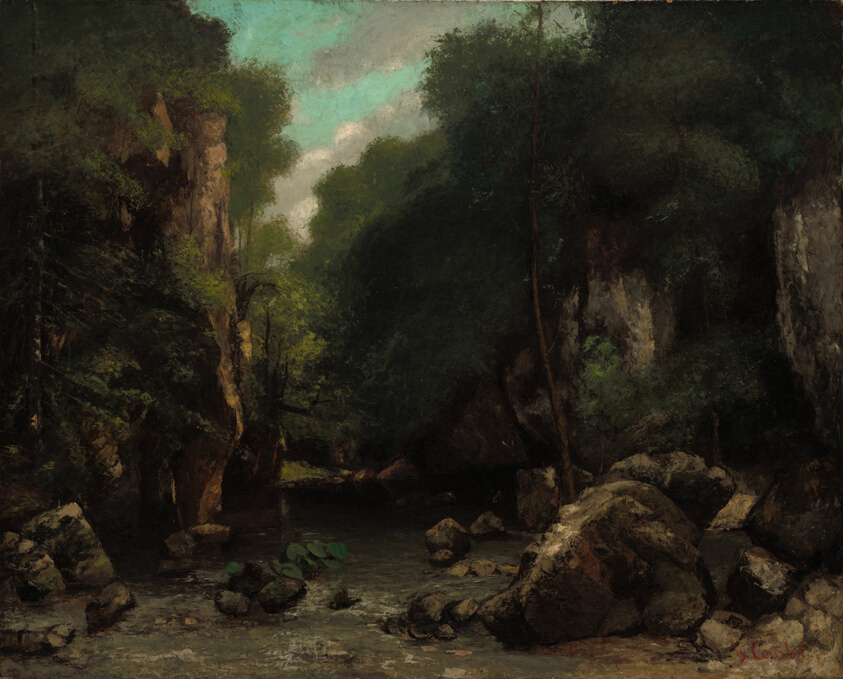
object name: Painting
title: The Valley of Les Puits-Noir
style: Realism, 19th century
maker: Gustave Courbet (French, 1819–1877)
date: 1868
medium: Oil on canvas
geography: France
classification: oil on canvas; french; oil paintings (visual works); paint; painting; european painting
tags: landscapes, clouds, sky, foliage, paths, Valley, trees, French, France, rocks, weather/seasons, water